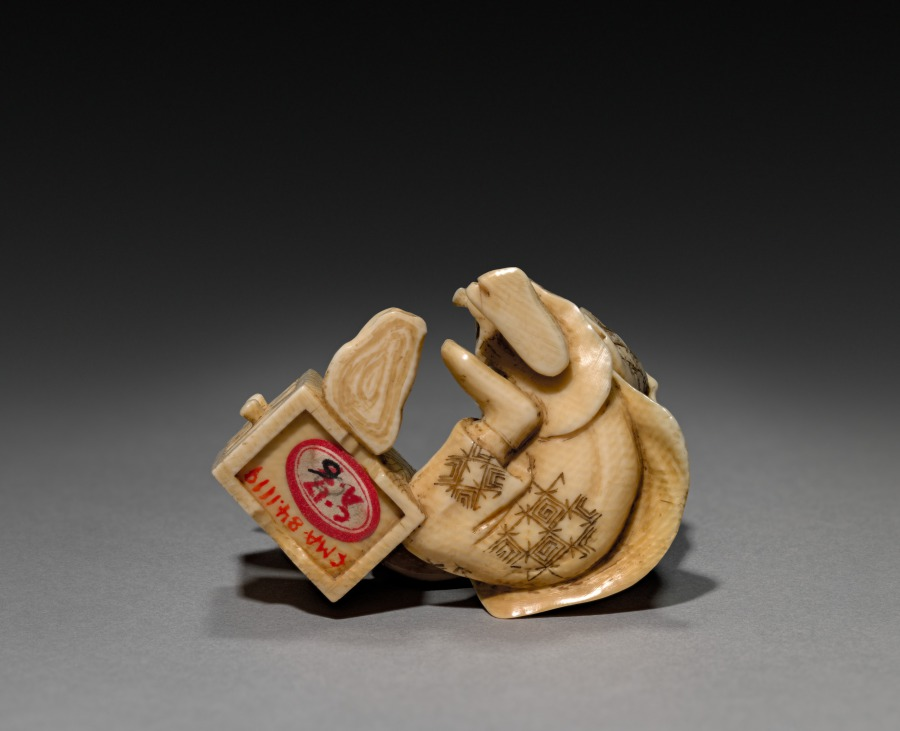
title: The Mask Maker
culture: Japan, Meiji period (1868–1912)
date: late 1800s to early 1900s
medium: ivory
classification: Ivory